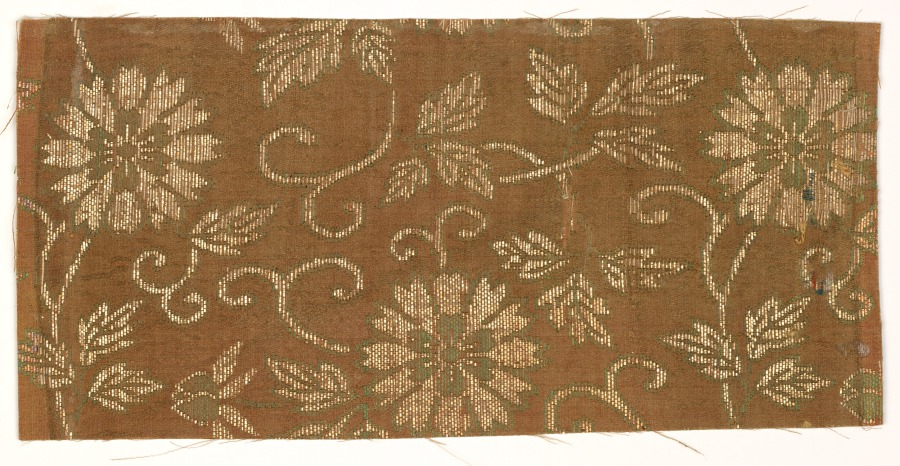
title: Textile Fragment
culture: Japan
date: 1800s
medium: silk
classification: Textile